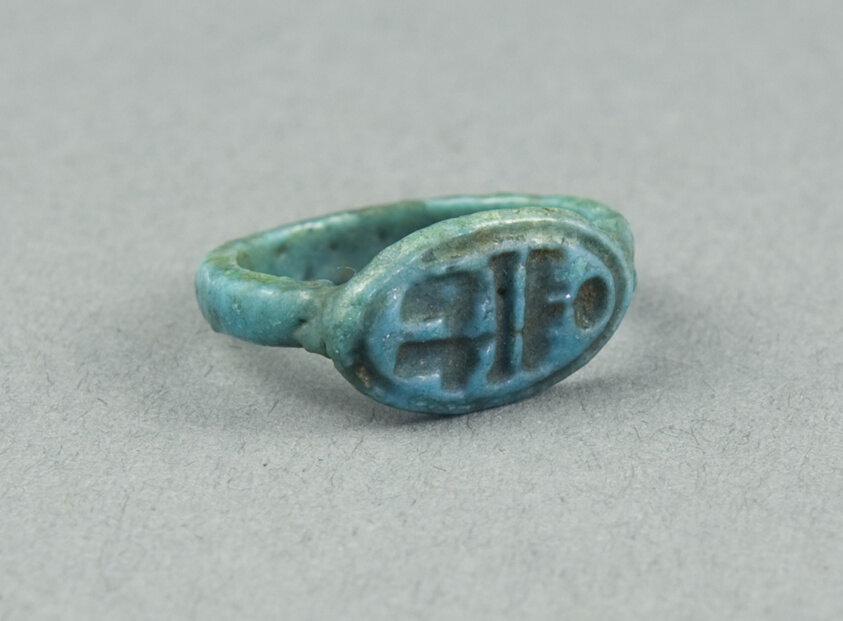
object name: Costume and Accessories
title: Ring: Menphetyre (Ramesses I)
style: nineteenth dynasty, new kingdom, egyptian, ancient, ramesside period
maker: Egyptian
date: New Kingdom, Dynasty 19, reign of Ramesses I (about 1295–1186 BCE)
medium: Faience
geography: Egypt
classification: ring (jewelry); ceramics; jewelry; ancient art; costume; faïence (composite material)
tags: Hieroglyphs